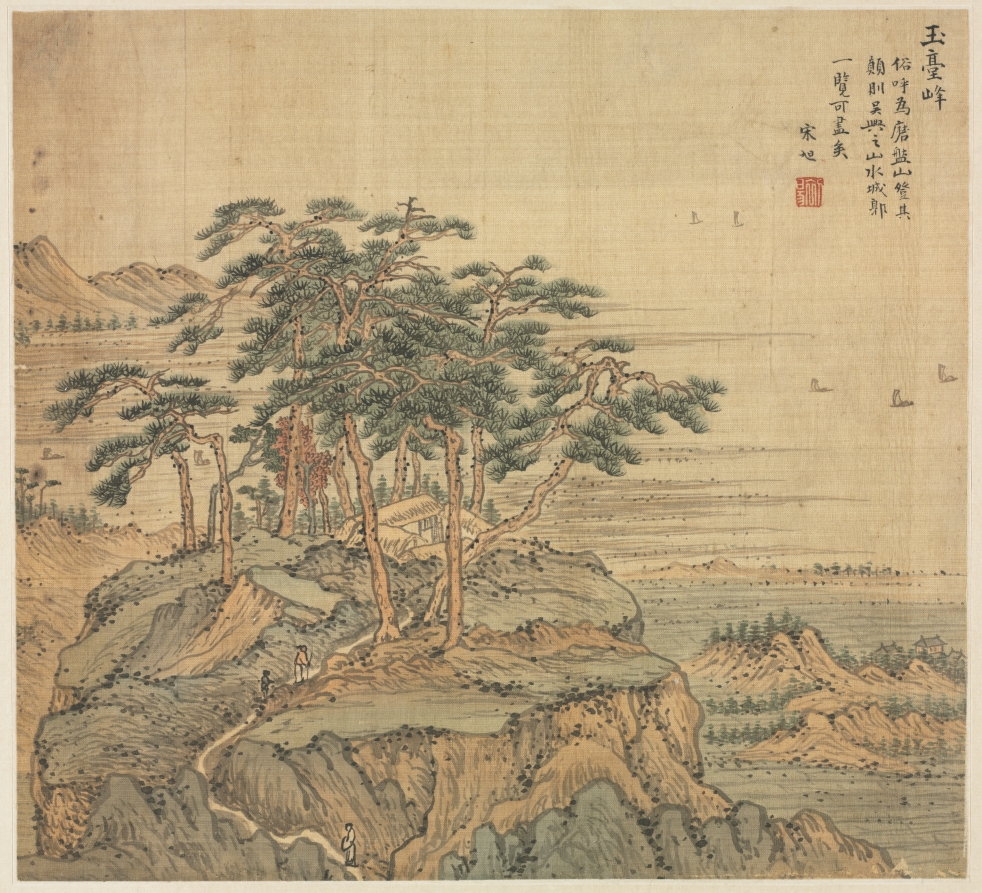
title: Yutai Peak (Jade Terrace Peak)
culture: China, Jiaxing, Ming dynasty (1368–1644)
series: Eighteen Views of Huzhou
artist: Song Xu (Chinese, 1525-c. 1606)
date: c. 1588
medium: Album leaf; ink and color on silk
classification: Painting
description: By the 1500s, visits to historic and scenic sites in the lower Yangzi delta stimulated an increase of printed illustrated travel books. Topographical depictions of local scenery flourished. Leaves from this album illustrates sites around Lake Tai of the two adjacent counties Changxing and Wuxing (modern Huzhou). Song Xu, who lived intermittently in Jiaxing and Songjiang, must have passed through Wuxing by boat and thus knew the region. The paintings are inscribed with gazetteerlike notations, suggesting that the album was produced for clients as commemorative works, a travel guide, or for “armchair travel” (woyou) in one’s mind.